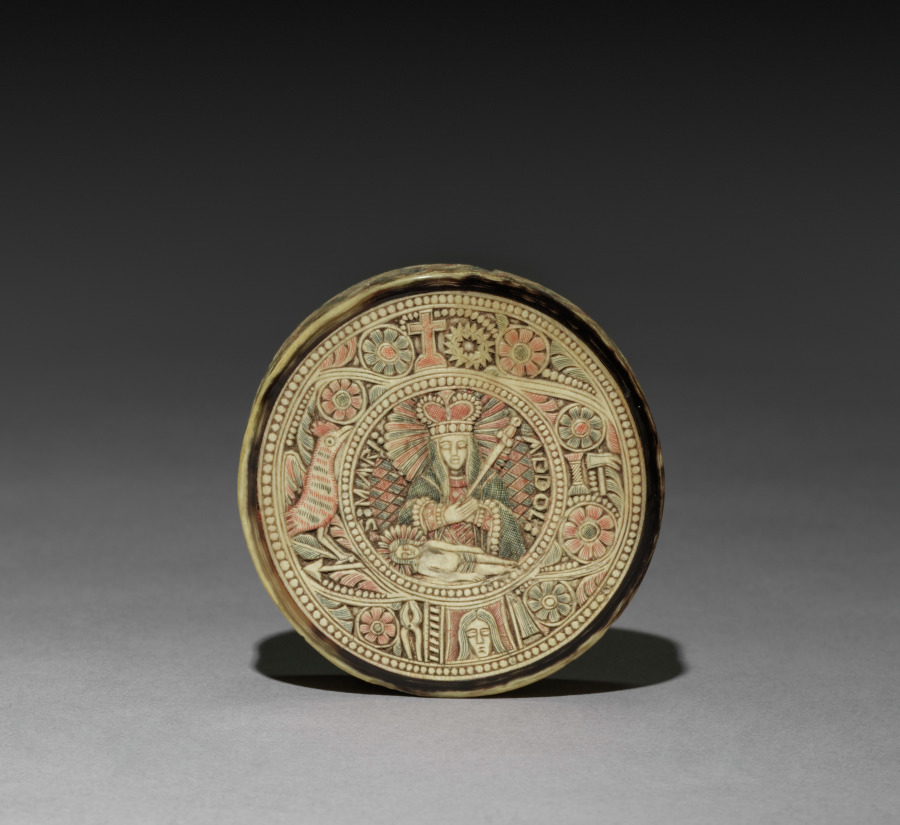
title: Box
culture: Spain (colonial ?), 19th century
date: 1800s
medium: bone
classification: Miscellaneous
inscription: on cover: "S:MARI:/ ADDOL:"; on back: "S:MARIAD:PIETA."